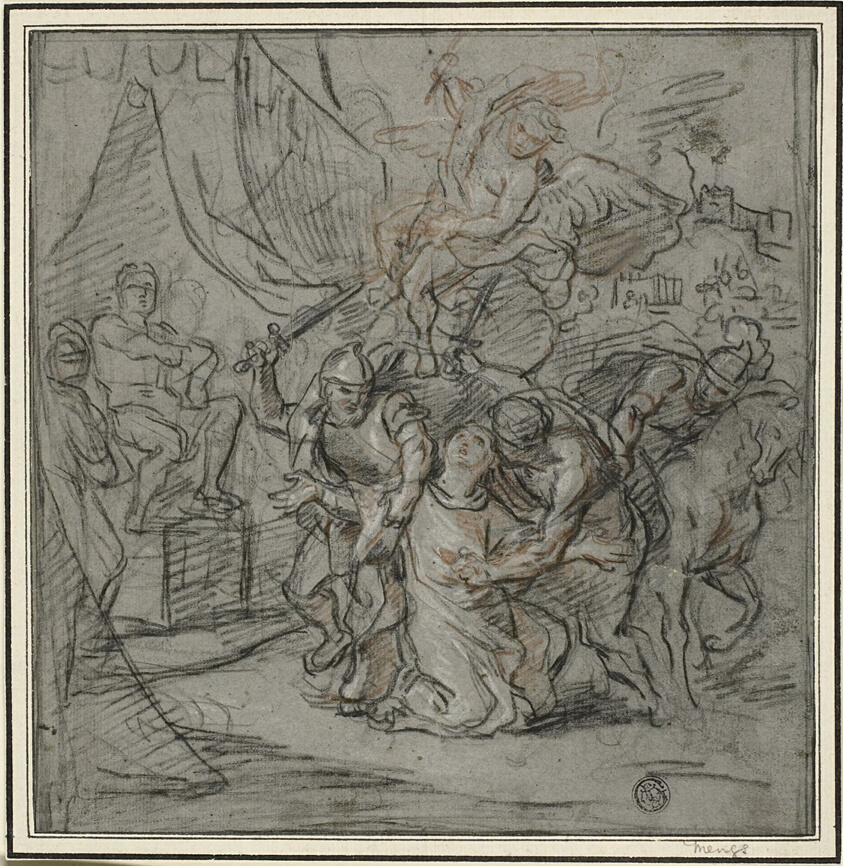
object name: Drawing and Watercolor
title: Martyrdom of a Saint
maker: Possibly Antoine Coypel; French, 1661-1722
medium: Red and black and white chalk, on gray laid paper, laid down on ivory laid paper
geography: France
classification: chalk; drawings (visual works); prints and drawing